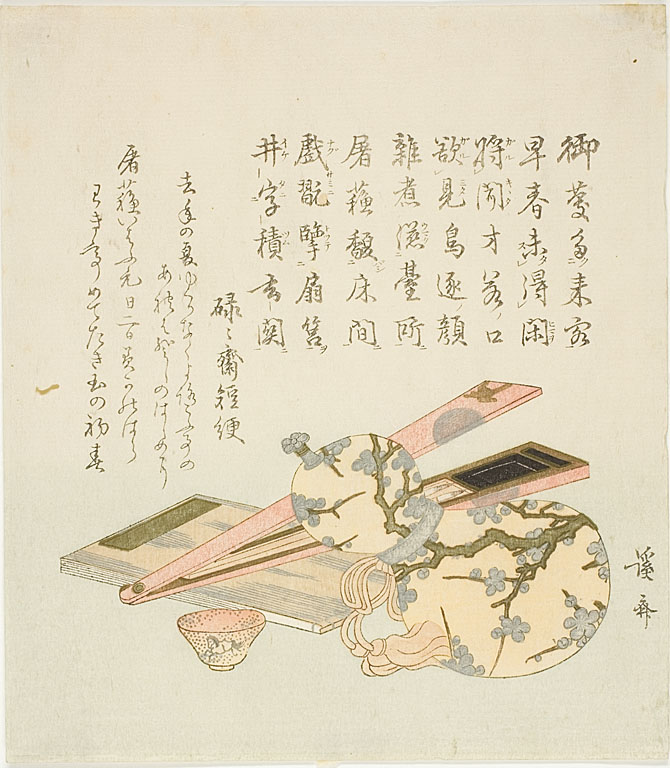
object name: Print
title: A Gourd Flask, a Cup, a Writing Box, and a Book for Rokurokusai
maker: Keisai Eisen (Japanese, 1790–1848)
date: 19th century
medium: Color woodblock print; surimono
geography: Japan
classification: woodblock print; print; asian art